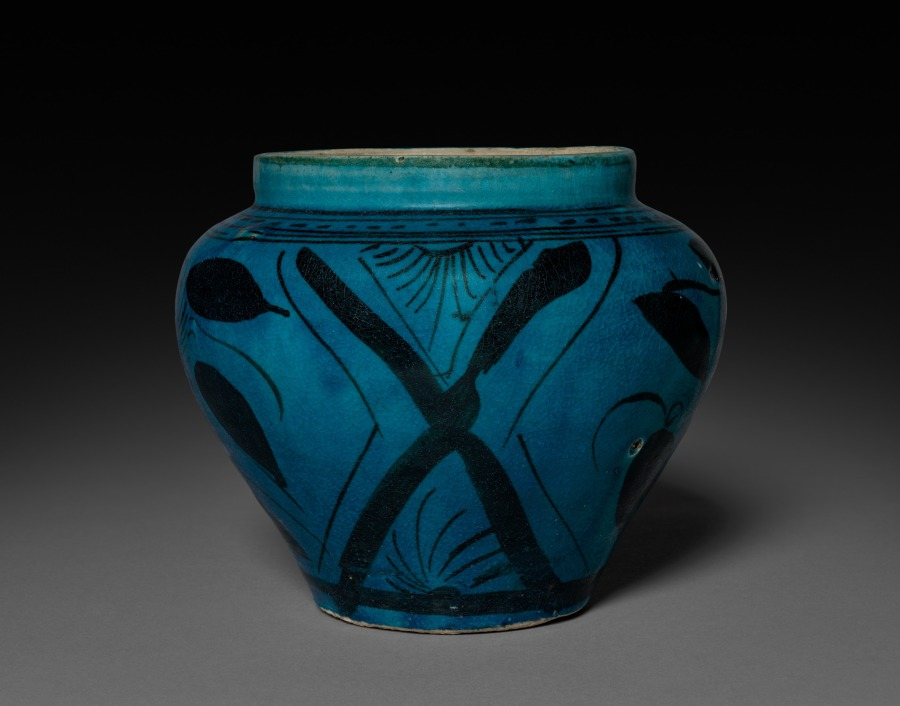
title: Jar: Cizhou ware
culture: China, Yuan dynasty (1271-1368)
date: 1271–1368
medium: stoneware with slip coating, turquoise glaze and painted underglaze decoration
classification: Ceramic